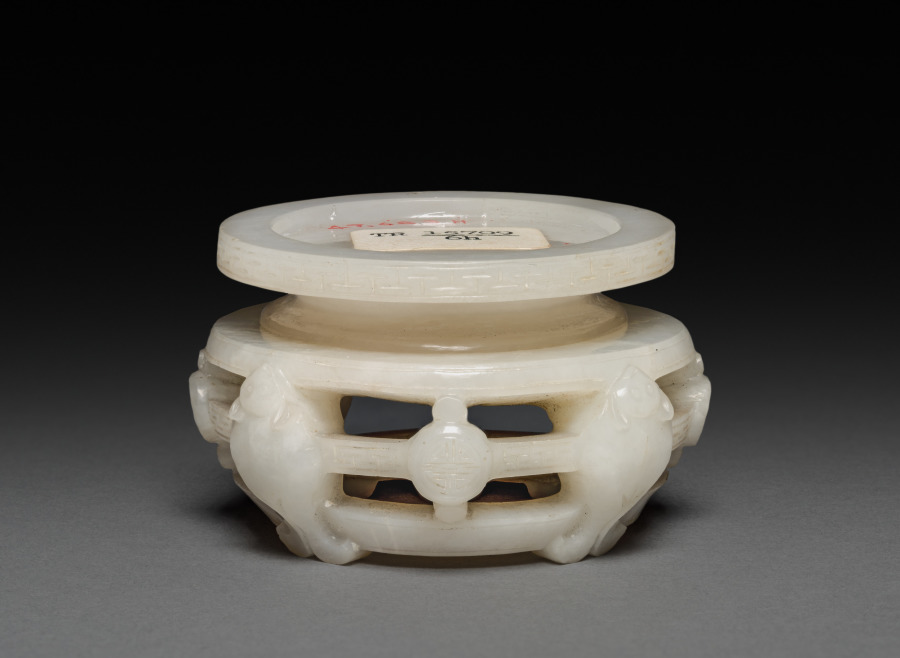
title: Three-Sectional Altar Group: Small Bowl with Carved Dragon with Lid and Base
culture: China, Qing dynasty (1644-1911)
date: 1644–1911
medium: jade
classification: Jade